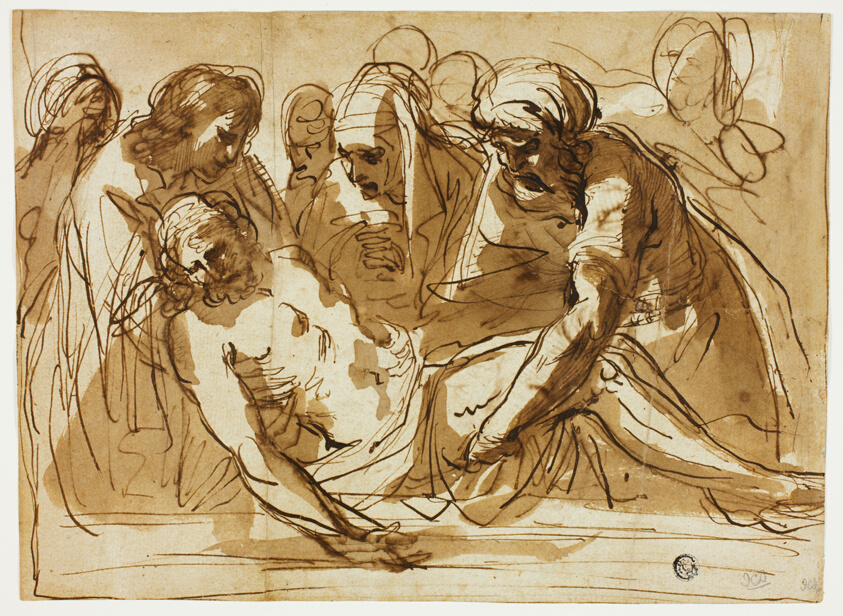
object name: Drawing and Watercolor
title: Entombment (recto); Virgin and Child with the Infant John the Baptist (verso)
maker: Imitator of Giovanni Francesco Barbieri, called Guercino; Italian, 1591-1666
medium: Pen and iron gall ink, with brush and brown wash, over traces of black chalk, on ivory laid paper, pieced and partially laid down (recto), and pen and iron gall ink on ivory laid paper (verso)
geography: Italy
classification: ink or chalk wash; drawings (visual works); prints and drawing